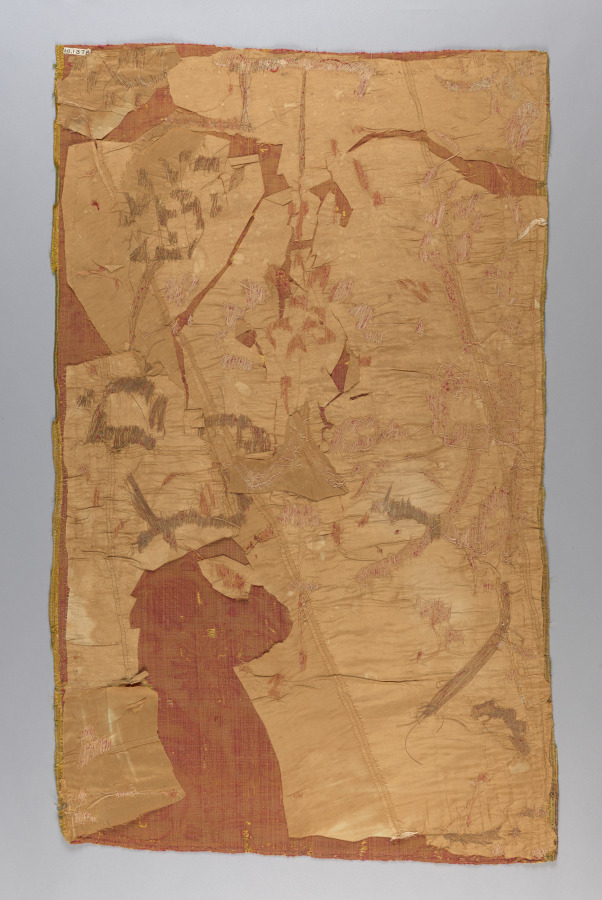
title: Velvet Cover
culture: Italy, Genoa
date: 1600s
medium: velvet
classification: Velvet